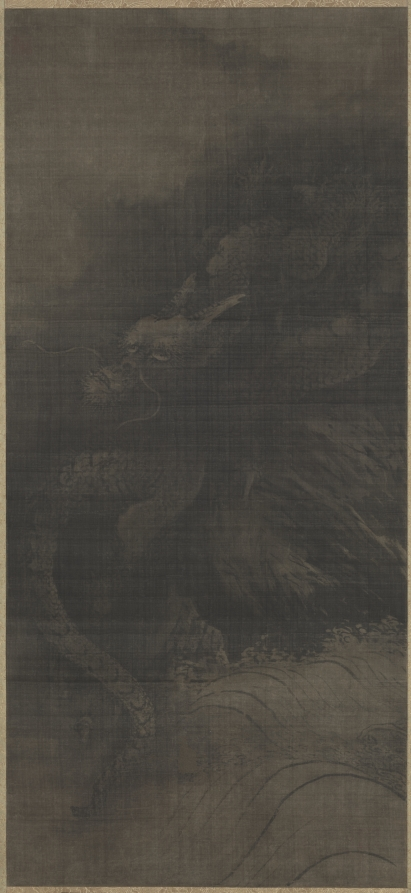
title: Dragon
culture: China, Southern Song dynasty (1127-1279)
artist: Fachang Muqi (Chinese, 1220–1280)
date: c. 1250–79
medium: Hanging scroll; ink on silk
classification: Painting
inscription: 道有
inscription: 雜華室印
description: The dragon and tiger are tied to the philosophical concept of yin and yang, which describes opposite but complementary forces. The dragon occupies a tiered background of waves and mist. Its luminous head emerges from the darker passages, and its narrow twisting body is serpent-like. By contrast, the close-up view of the tiger emphasizes its bulk. The tiger bends its head to lick its paw while its tail curls in the foreground. In their original Chan Buddhist context, this pair of scrolls likely flanked a central image, like the Bodhisattva Guanyin. The silk has darkened over the centuries, and the slight reddish shading in the tiger’s tongue and nose has faded.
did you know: Fachang Muqi was a Chinese Chan Buddhist monk and painter.